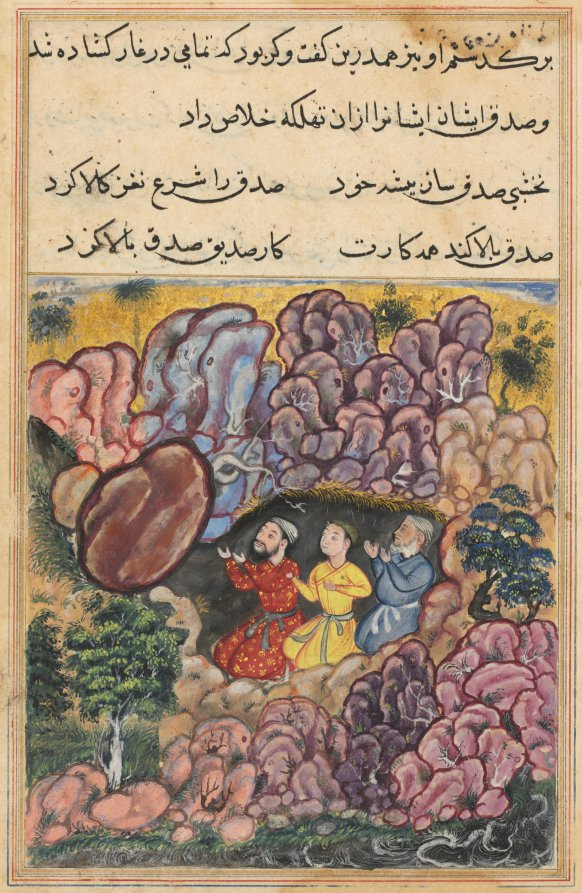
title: The tale of the three men trapped in a cave by a rolling boulder, from a Tuti-nama (Tales of a Parrot): Thirty-second Night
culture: Mughal India, court of Akbar (reigned 1556–1605)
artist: attributed to Bihzad (Persian, active in India mid-1500s)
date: c. 1560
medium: gum tempera, ink, and gold on paper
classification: Painting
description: Three men kneel in the bowels of a dark cave where they have been trapped while seeking hidden treasure. Fearful and desperate, they suddenly hear a disembodied voice that orders them to confess their transgressions. As each man speaks, a portion of the boulder disappears, and they are ultimately freed.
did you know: This painting is attributed to Bihzad, the son of Abd al-Samad the Persian master of the Mughal court.